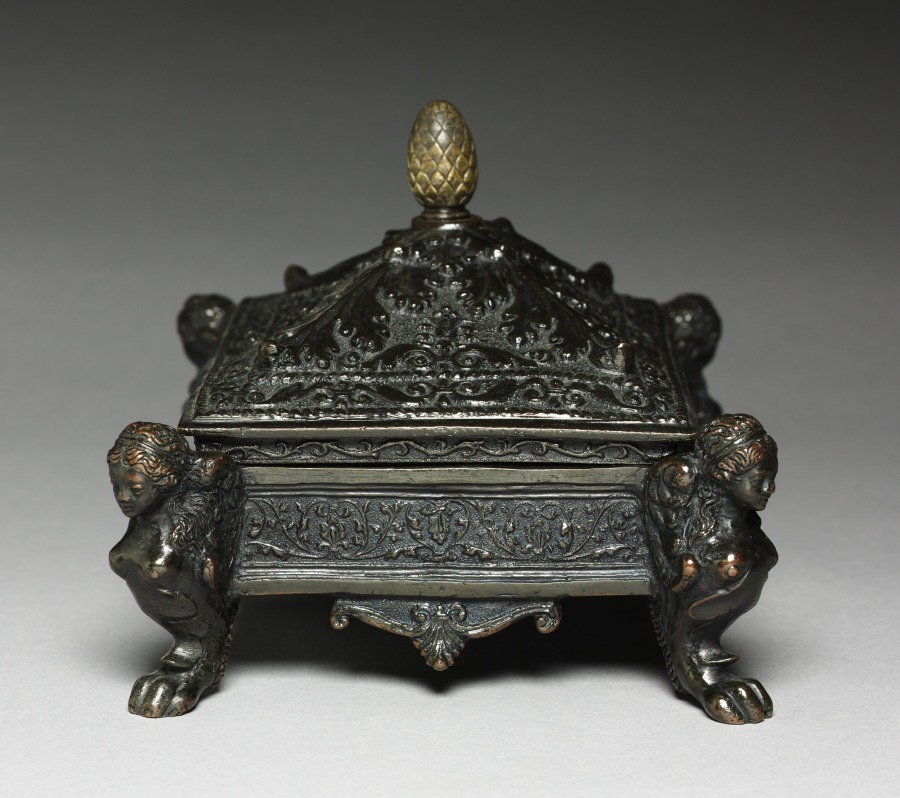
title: Writing Casket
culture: Italy, Ravenna, 16th century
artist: workshop of Severo da Ravenna (Italian, c.1496–c.1543)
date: c. 1525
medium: bronze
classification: Sculpture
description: The interior is divided into four compartments for storing writing implements and sand for blotting.